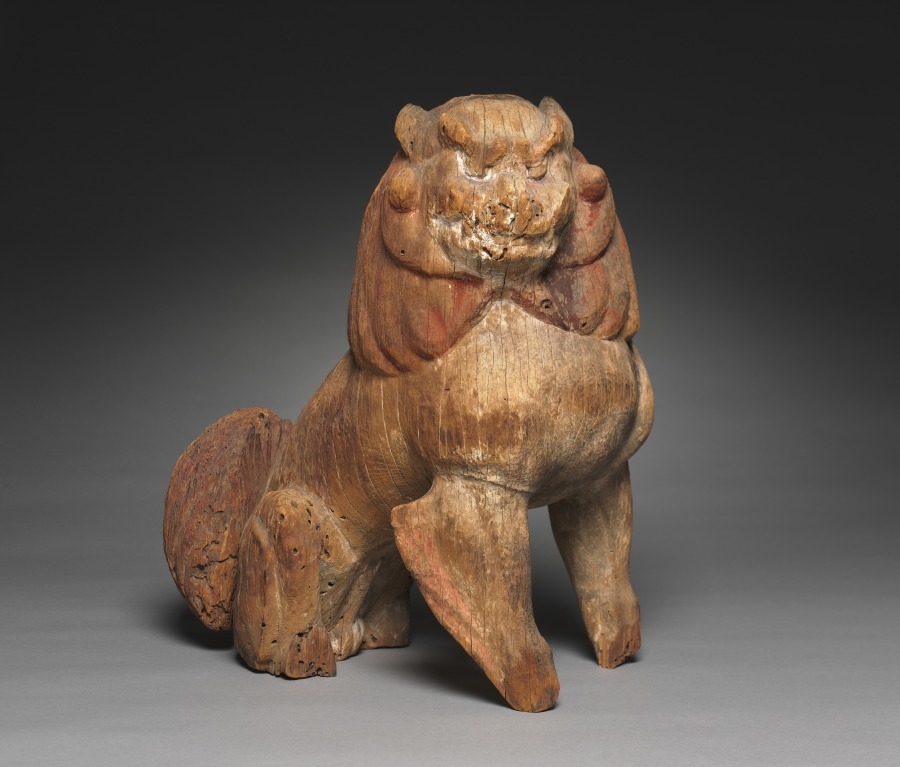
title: Pair of Guardian Animals: Karashishi and Komainu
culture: Japan, Kamakura period (1185–1333)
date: 1300s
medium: Wood with traces of color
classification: Sculpture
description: Placed at the entrance to shrines and temples in Japan, guardian figures ward off evil spirits. These guardians used to be painted red and white and are distinguishable by their facial expressions: the open-mouthed animal is a karashishi, or “Chinese lion,” while the close-mouthed beast, which once had a single horn protruding from its head, is called a komainu, or “Korean dog.” The mouths correspond to infinity, the syllables ah (open) and um (closed), or the alpha and omega. This pairing was widespread in ancient times in Chinese territories and likely found its way to Japan via kingdoms in Korea.